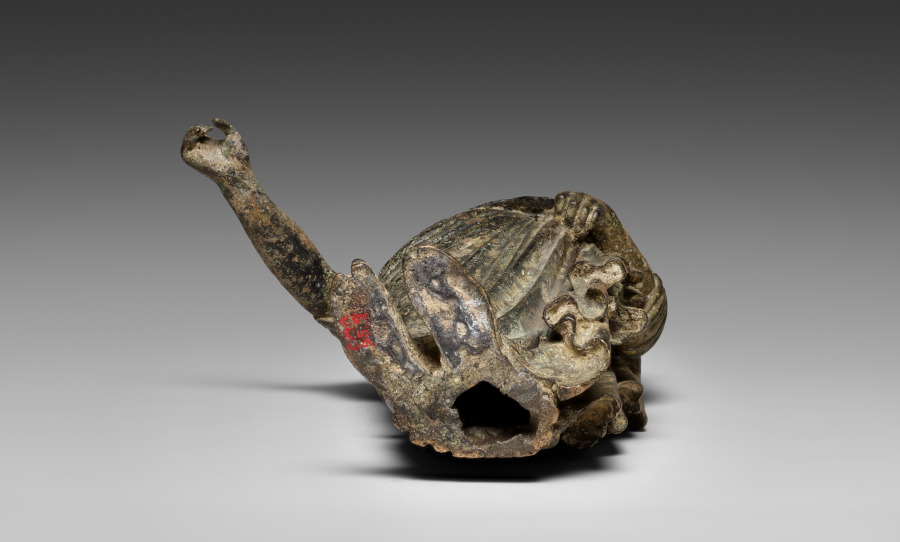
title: Statuette of Dionysos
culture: Italy, Roman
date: 50 BCE–50 CE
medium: bronze and silver and traces of gilding, hollow cast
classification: Sculpture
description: This bronze figure of Dionysos, the god of wine, theater, and the mysteries, is presented in a style recalling Archaic Greek art, most noticeably in his stiff pose and trimmed beard. The more naturalistic folds of his garment speak to a later date, in the Roman period. The disk attached at the top of the head suggests that this figure was once part of an ornate piece of furniture, perhaps a stand or support. In his right hand, the god likely held a kantharos or other attribute. He would have been further embellished with inlaid copper (lips), silver (whites of eyes), and perhaps gilding (garment).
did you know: Over his long, thin garment, Dionysos wears an animal skin, fastened on his left shoulder.